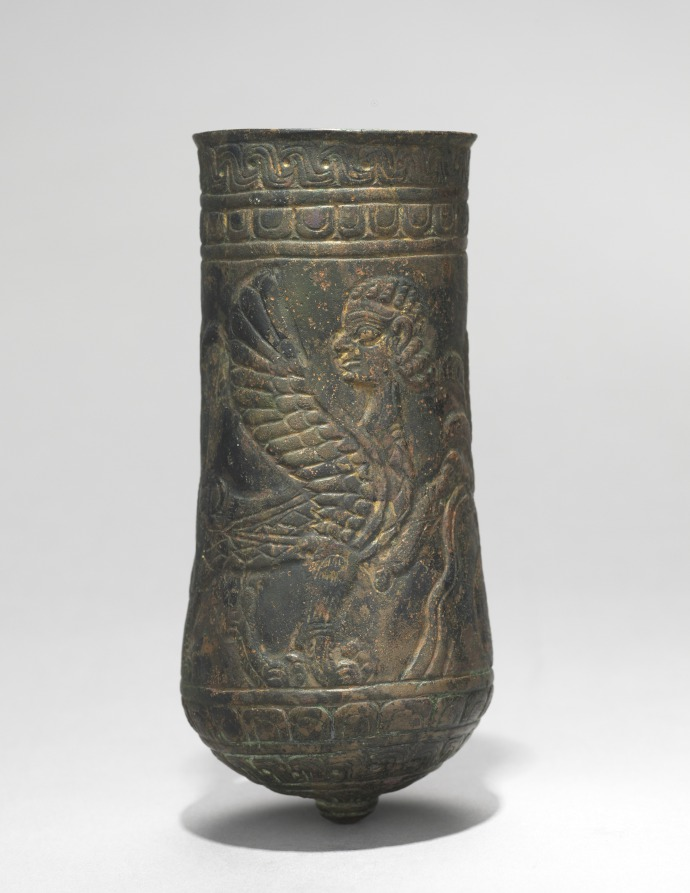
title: Button-Based Situla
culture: Iran, Luristan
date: 900–700 BCE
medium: bronze, repoussé, punched, incised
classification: Metalwork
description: The metalworkers of Luristan provided the Assyrian empire with elaborate bronze ornaments and vessels. These two situla are decorated symmetrically---one with ibexes drinking from an overflowing water jar; the other, with sphinxes.